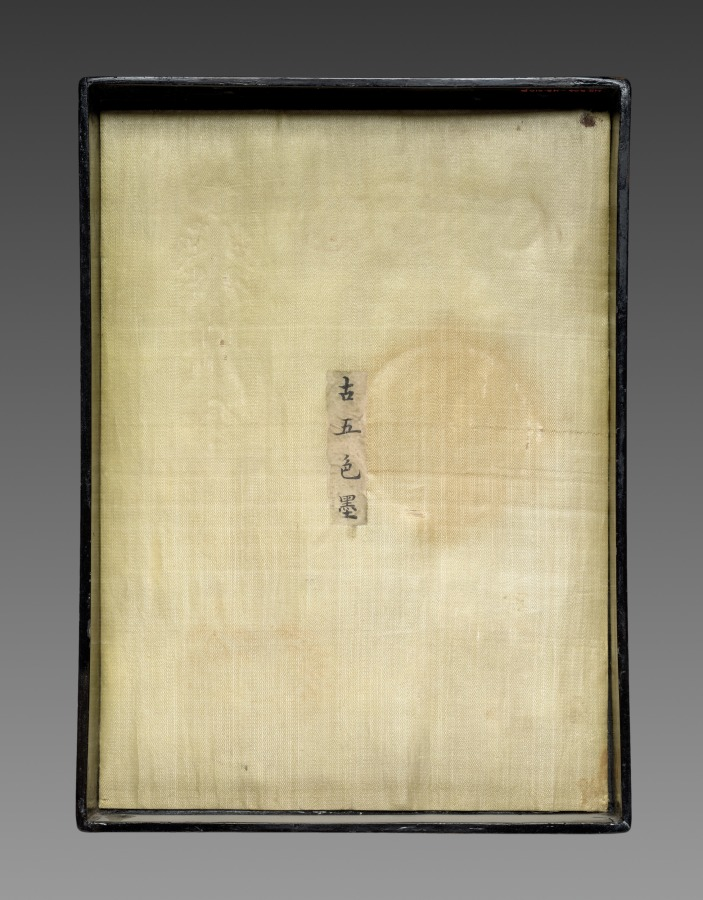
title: Box with Ink Cakes (lid)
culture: China, Qing dynasty (1644-1911), Jiaqing reign (1795-1820)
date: 1795–1820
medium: lacquer and silk box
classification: Lacquer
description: Ink cakes (also called ink sticks) are dissolved with the addition of water and then ground on the surface of a flat square stone into liquid ink for painting and calligraphy. The precious ink cakes here, however, have never been used. The inscription on the side of the blue ink cake says that the set was commissioned by Chen Huai, governor of Jiangxi province.